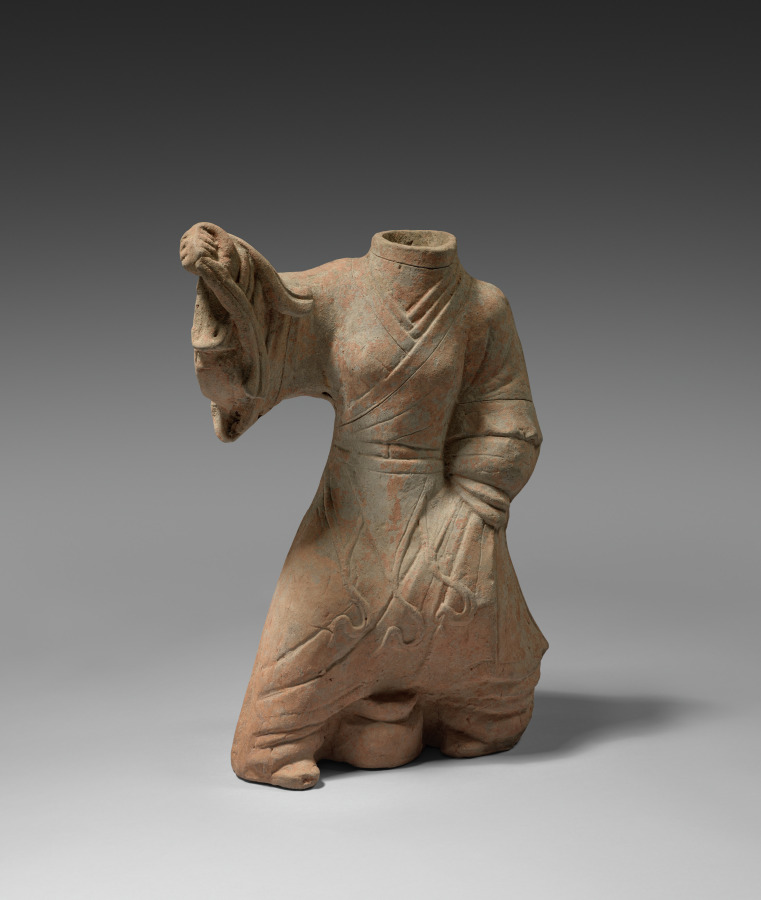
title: Female Figure of a Court Entertainer Dancing (Body)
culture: China, Sichuan province, Eastern Han dynasty (25–220 CE)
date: 100s CE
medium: Pottery with traces of color pigment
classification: Ceramic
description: During the Han era, tombs of the elite were provided with sculpted renditions of their earthly entourage, such as guardians or musicians, to signify their status in the afterlife. The female dancer with elaborate hairdo held by flower ornaments raises one arm holding her wide sleeve with one hand, while the other lifts her robe to reveal what appears to be a drum underneath her garment, her face smiling, all in a gesture of an entertainer.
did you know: The dancer lifts her robe to reveal what appears to be a drum underneath her garment.